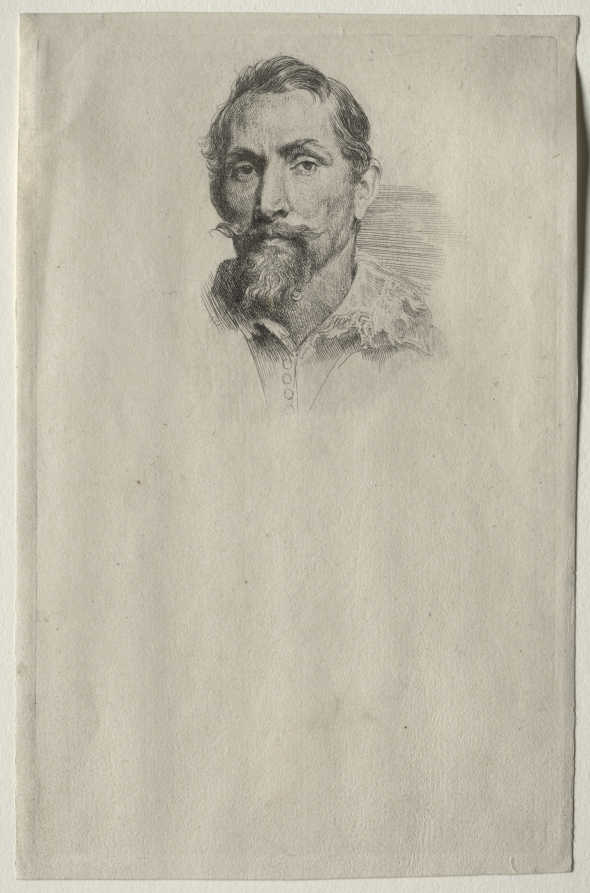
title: Frans Snyders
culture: Flanders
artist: Anthony van Dyck (Flemish, 1599–1641)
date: 1630–33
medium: etching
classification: Print